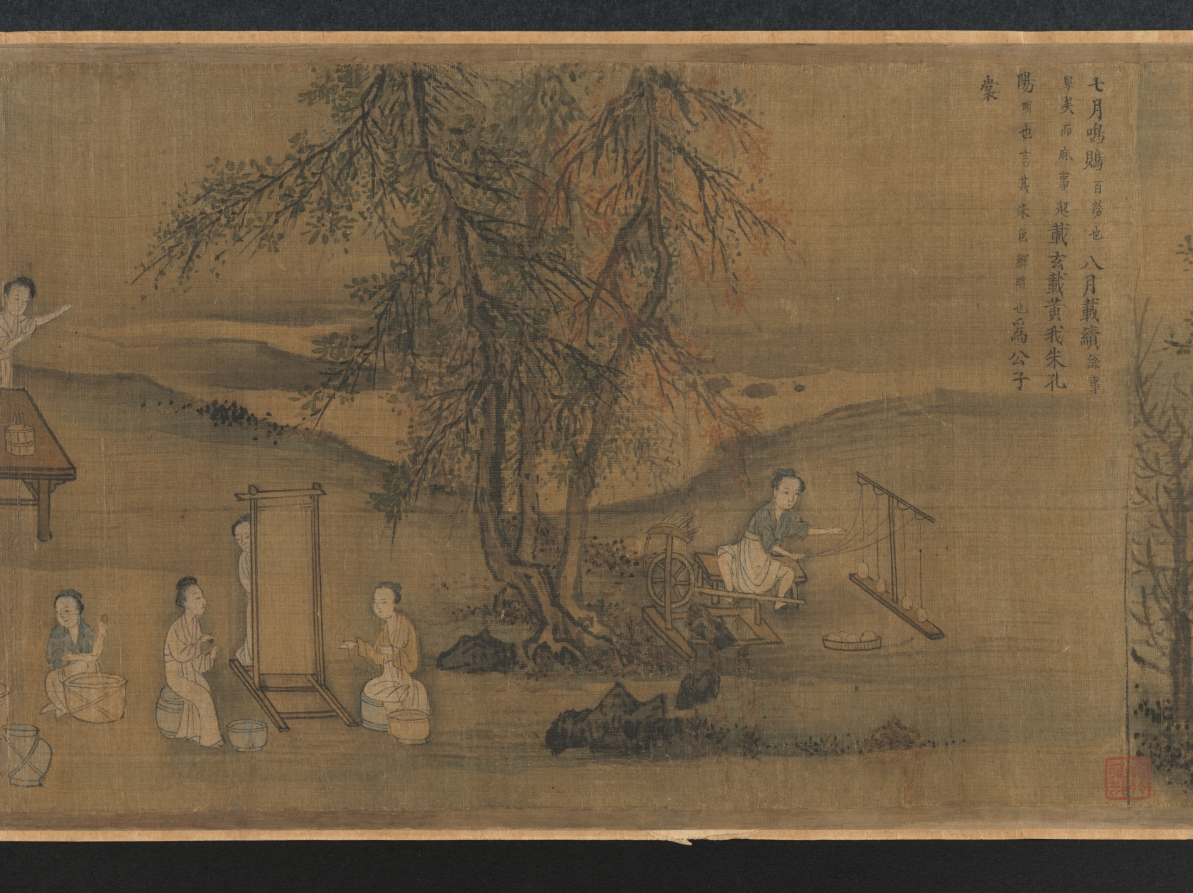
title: "Seventh Month" from the Odes of Bin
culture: China, Southern Song dynasty (1127-1279)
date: 1200s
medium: Handscroll; ink and color on silk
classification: Painting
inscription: Colophons: 1. [on the frontispiece] by the Qianlong emperor (dated 1741). 2. by Lu Wan (dated Zhengde dingchou, 1517). 2. by the Jiaqing emperor (dated 1807).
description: According to Confucian thought, the ruler looks after the well-being of his people which involves agricultural activities. Seventh Month from the ancient Odes of Bin in the Shijing (Book of Poetry) describes occupations throughout the year, including plowing, harvesting, hunting, making clothes, and observing rituals. The earliest illustrations of these Odes accompanied by text were commissioned by Southern Song emperor Gaozong (reigned 1127–1162). As the lower Yangzi delta had become the new seat of government, Gaozong had sets of these illustrations produced by court artists to revive the dynasty and convince the Confucian officialelite of his legitimacy to rule.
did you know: The Odes of Bin appears in the classic Shijing (Book of Poetry), an anthology of more than 300 poems, folk songs, and ceremonial hymns that were originally chanted to music.